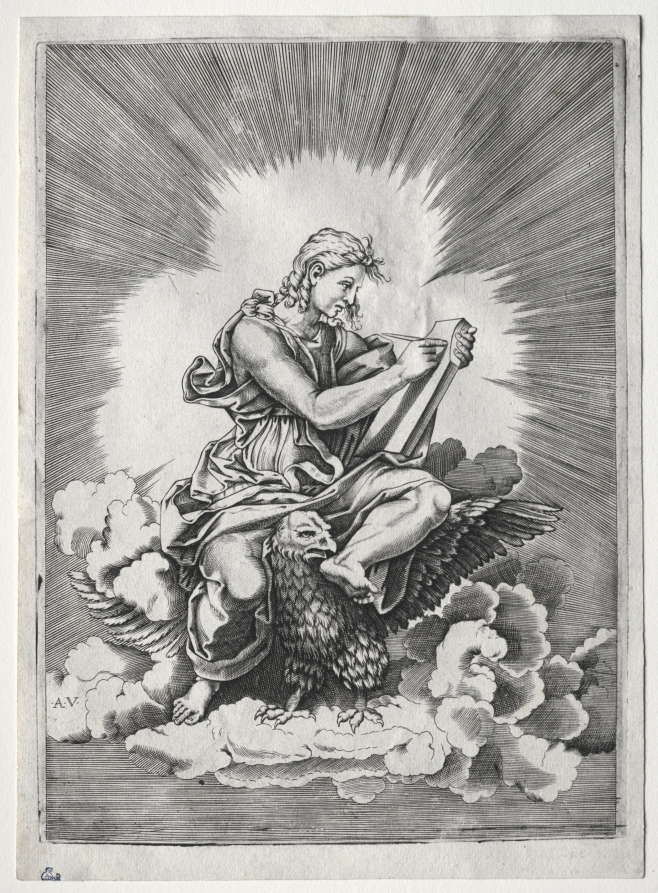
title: The Four Evangelists: St. John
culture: Italy, 16th century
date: c. 1518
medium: engraving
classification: Print